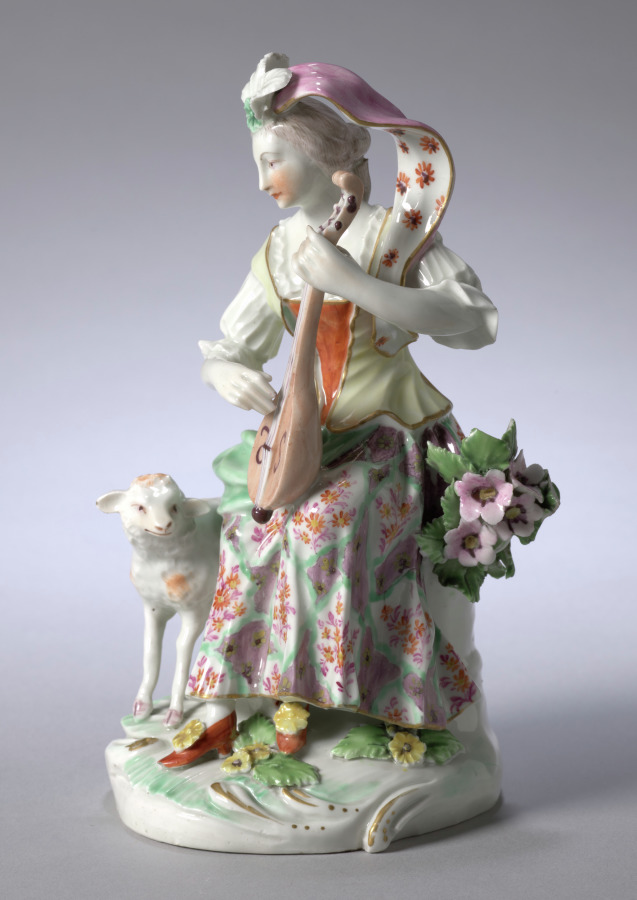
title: Seated Musician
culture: England, Derby, 18th century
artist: Derby Porcelain Factory (British)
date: c. 1765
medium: soft-paste porcelain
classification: Ceramic